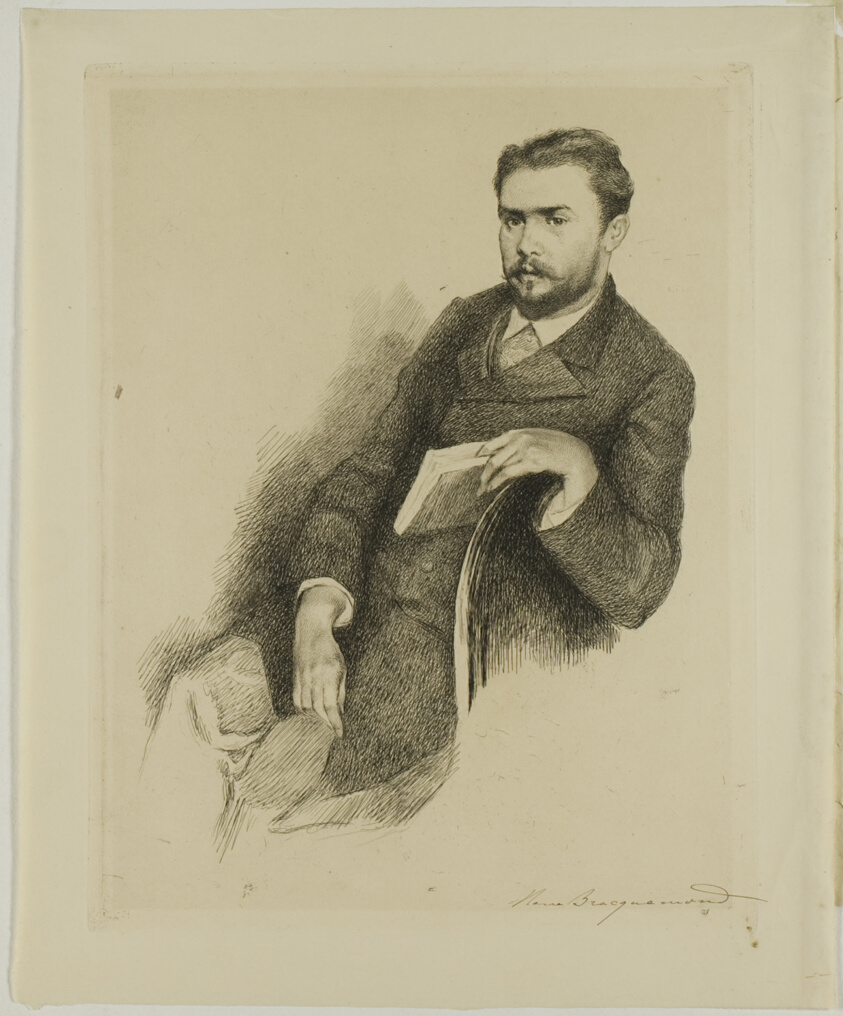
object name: Print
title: Portrait of the Critic Gustave Geffroy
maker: Marie Bracquemond (French, 1840-1916)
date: by 1890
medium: Etching in black on cream wove paper, tipped onto ivory wove paper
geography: France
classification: etching; paper; print; prints and drawing